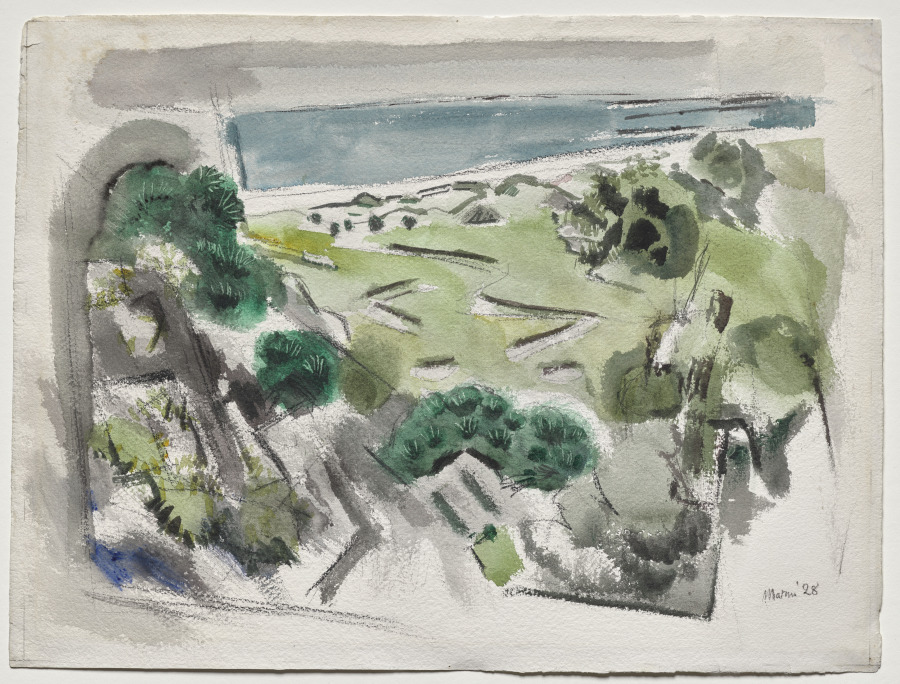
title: On Morse Mountain, No. 6, Maine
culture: America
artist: John Marin (American, 1870–1953)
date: 1928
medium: Watercolor and black crayon and reductive work with the end of paint brush on thick, moderately rough-textured wove paper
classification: Drawing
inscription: Recto, lower right: "Marin '28"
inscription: Written in pencil on verso: "On Morse Mountain/#6-28"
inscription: Written in pencil on verso: "No 5 (scribbled out in pencil)"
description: One of America's most important watercolor practitioners, John Marin spent every summer in Maine from 1914 through 1928, and the state's coastline became a central focus of his work. By the late 1920s, when this work was made, he was experimenting with bold black elements in his compositions and painted frames or borders. On Morse Mountain, No. 6, Maine shows Marin using dry charcoal to create areas of shocking black over which he layered inky black wash. The technique has the effect of framing the image and leading the eye toward the center. With its strikingly different character from other works made in Maine in 1914 (see 2020.134, 2020.136, 2020.137, 2020.138, 2020.139), the work shows how John Marin repeatedly challenged himself as well as the medium of watercolor with improvisations in color, paint handling, perspective, and movement.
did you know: John Marin made this watercolor during one of the last summers he would spend in Maine, at a time when he called most of the watercolors he executed "Movements in Paint."